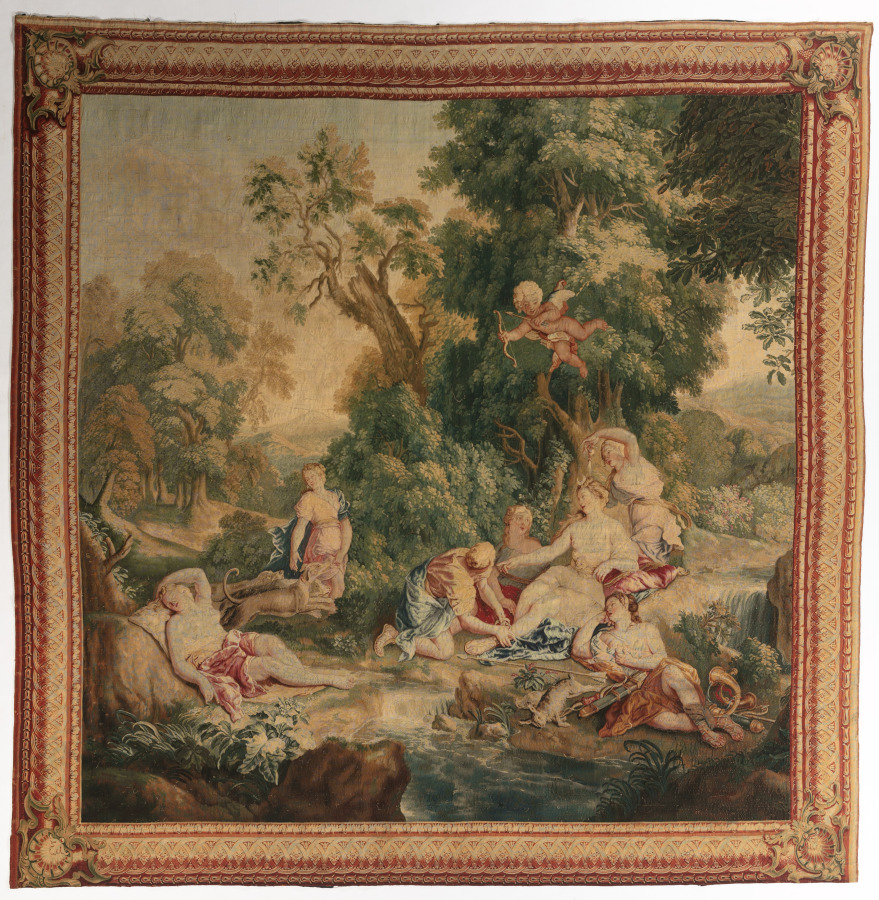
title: Set of Ovid's Metamorphoses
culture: France, 18th century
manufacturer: Gobelins Manufactory (France, Paris, est. 1662)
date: 1704–31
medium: tapestry weave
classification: Tapestry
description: Each tapestry illustrates a scene from Metamorphoses, written by the ancient Roman poet Ovid. The poem is comprised of fifteen books and contains more than 250 myths. These tapestries were produced in Paris by the royal Gobelins Manufactory during the 1700s. Gobelins was founded in 1662 for the purpose of furnishing French royal homes with the highest quality textiles. Gold and silver thread and silk were woven together to create luxurious tapestries like these.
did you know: During the French Revolution, Gobelins tapestries were sometimes disassembled to harvest the gold threads.